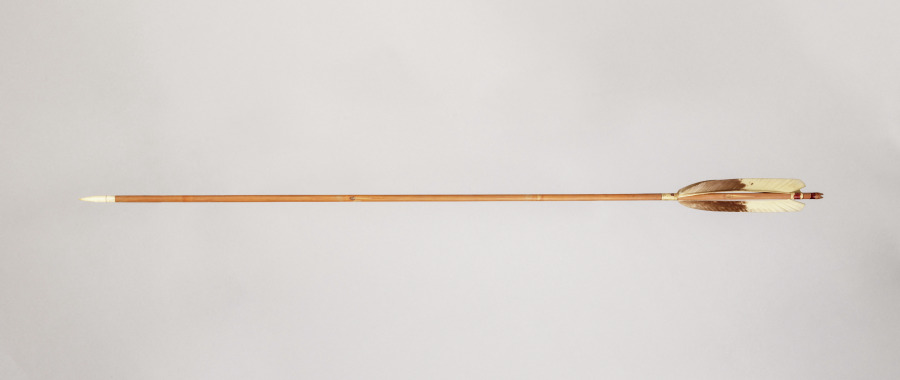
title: Arrow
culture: Japan, Edo period (1615–1868) to Meiji period (1868–1912)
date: 1800s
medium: bamboo shaft tipped with metal point and heeled with feathers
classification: Arms and Armor